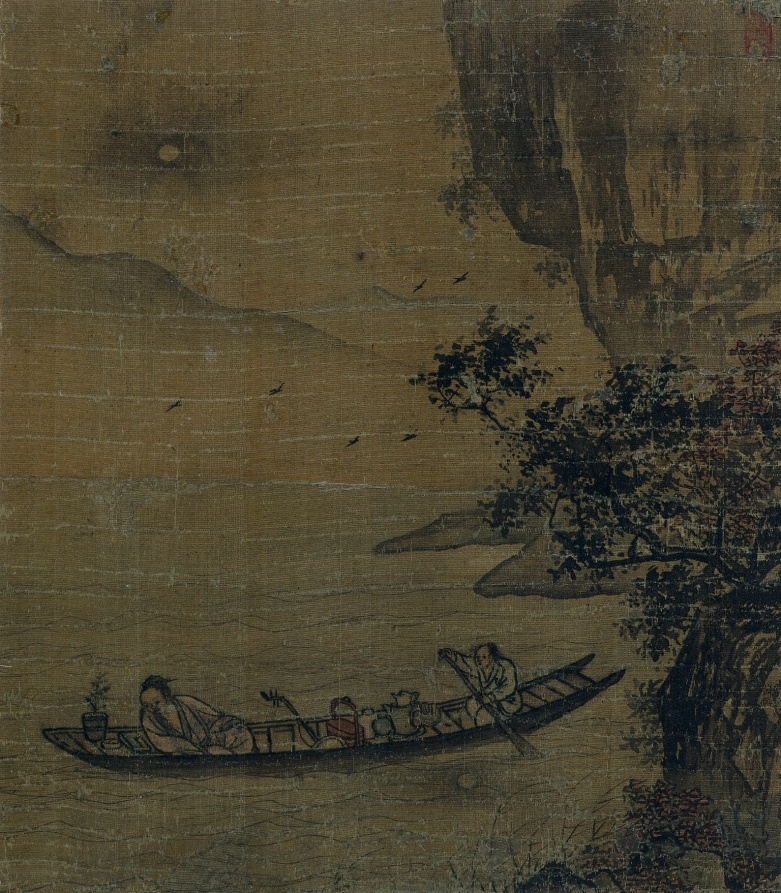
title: Boating in Moonlight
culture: Korea, Joseon dynasty (1392–1910)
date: 1600s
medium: album leaf; ink on silk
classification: Painting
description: Painted in bold brushstrokes and ink wash, contrasting black and white, and occupied and voided space, this intimately sized painting depicts a scholar-hermit enjoying elegant boating under moonlight. The theme of a moonlight boat excursion below a cliff depicted in this work echoes the tradition of illustrating "Ode to the Red Cliff," a pair of poems by Su Shi, famous Northern Song Chinese poet (1037–1101).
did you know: Look how many objects are contained in this little boat—a potted plant, a book, a pear-shaped lute, a tiered lunch box, a tea pot, and a portable stove.